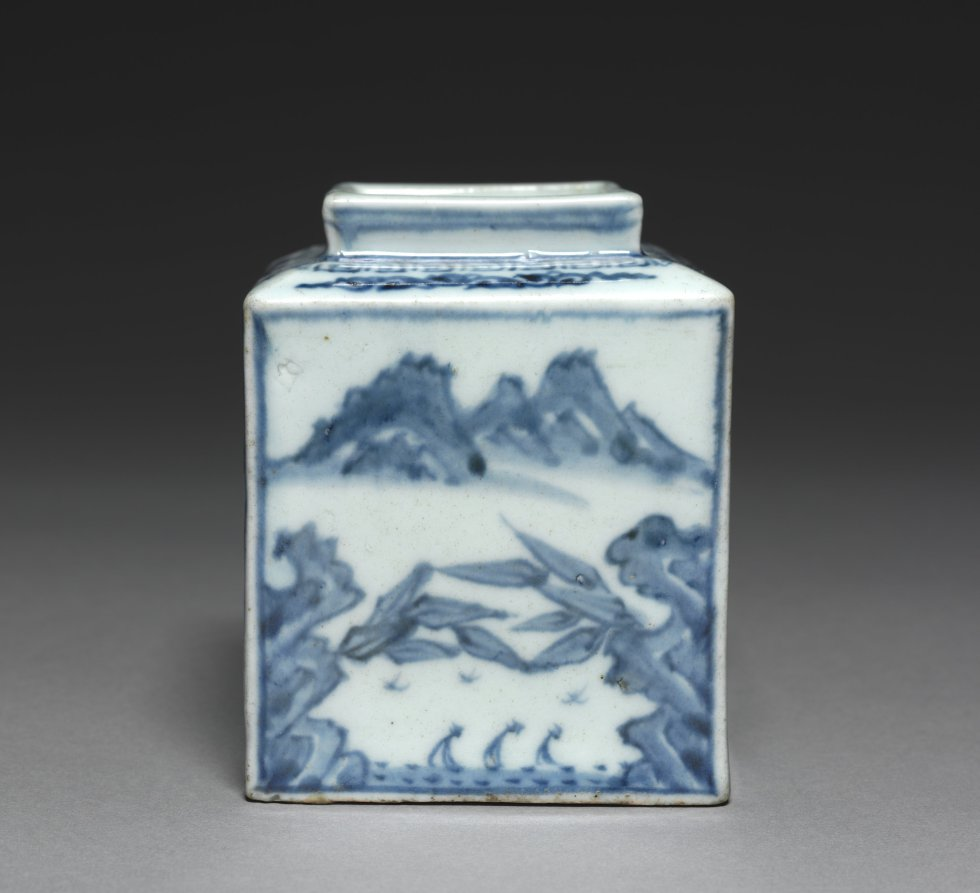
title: Square-shaped Bottle with the Scenery of the Han River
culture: Korea, Joseon dynasty (1392–1910)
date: 1800s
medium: porcelain with underglaze cobalt blue decoration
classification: Ceramic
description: The depicted scenery of this bottle is the Han River, the principal river crossing the center of Seoul. Since the 1700s, Korean artists began to paint the real landscape of Korea instead of imaginary ones of the Chinese tradition. This blue-and-white porcelain bottle is presumably a water dropper for ink. Each facet was separately made and put together before firing in a kiln. Both the landscape motif and faceted bottle were in vogue in the late 19th century, largely produced to meet the growing demand from the elite class.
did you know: The Han River is the principal river crossing the center of Seoul.